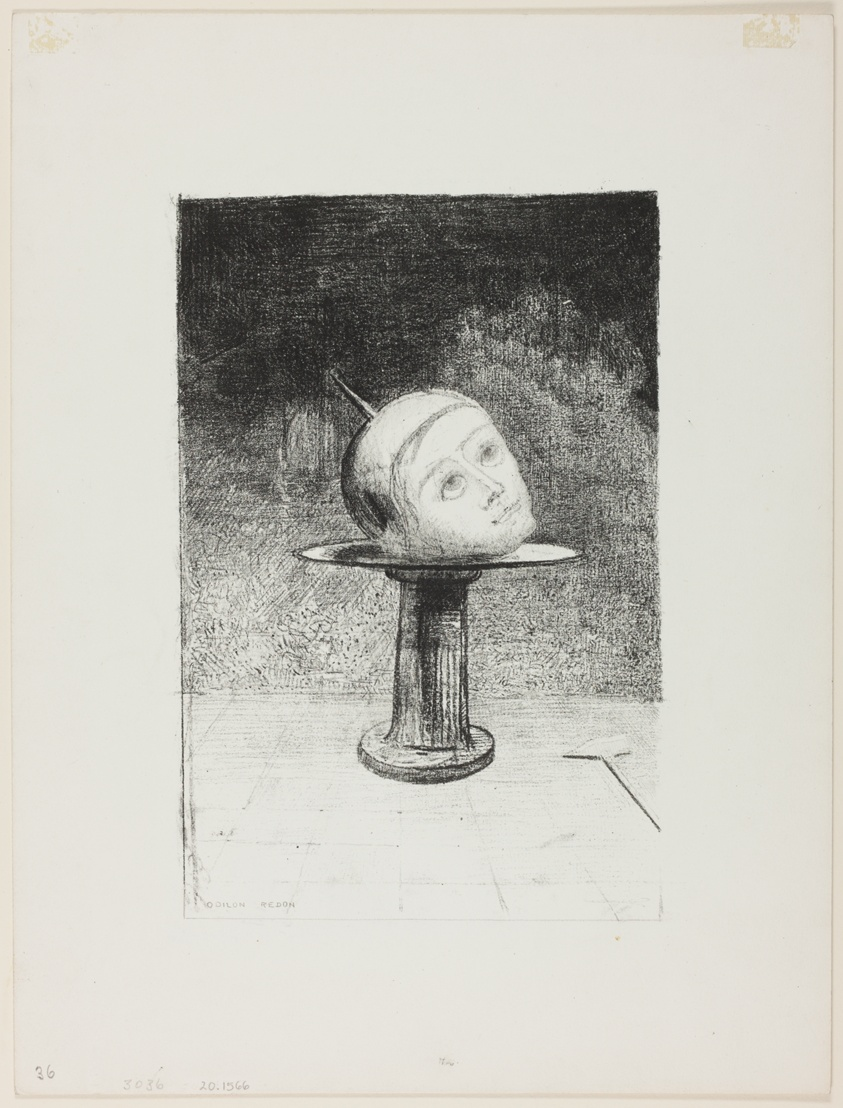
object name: Print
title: On the Dish, plate ten from In Dreams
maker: Odilon Redon (French, 1840-1916)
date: 1879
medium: Lithograph in black on ivory wove paper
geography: France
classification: lithograph; print; prints and drawing; paper